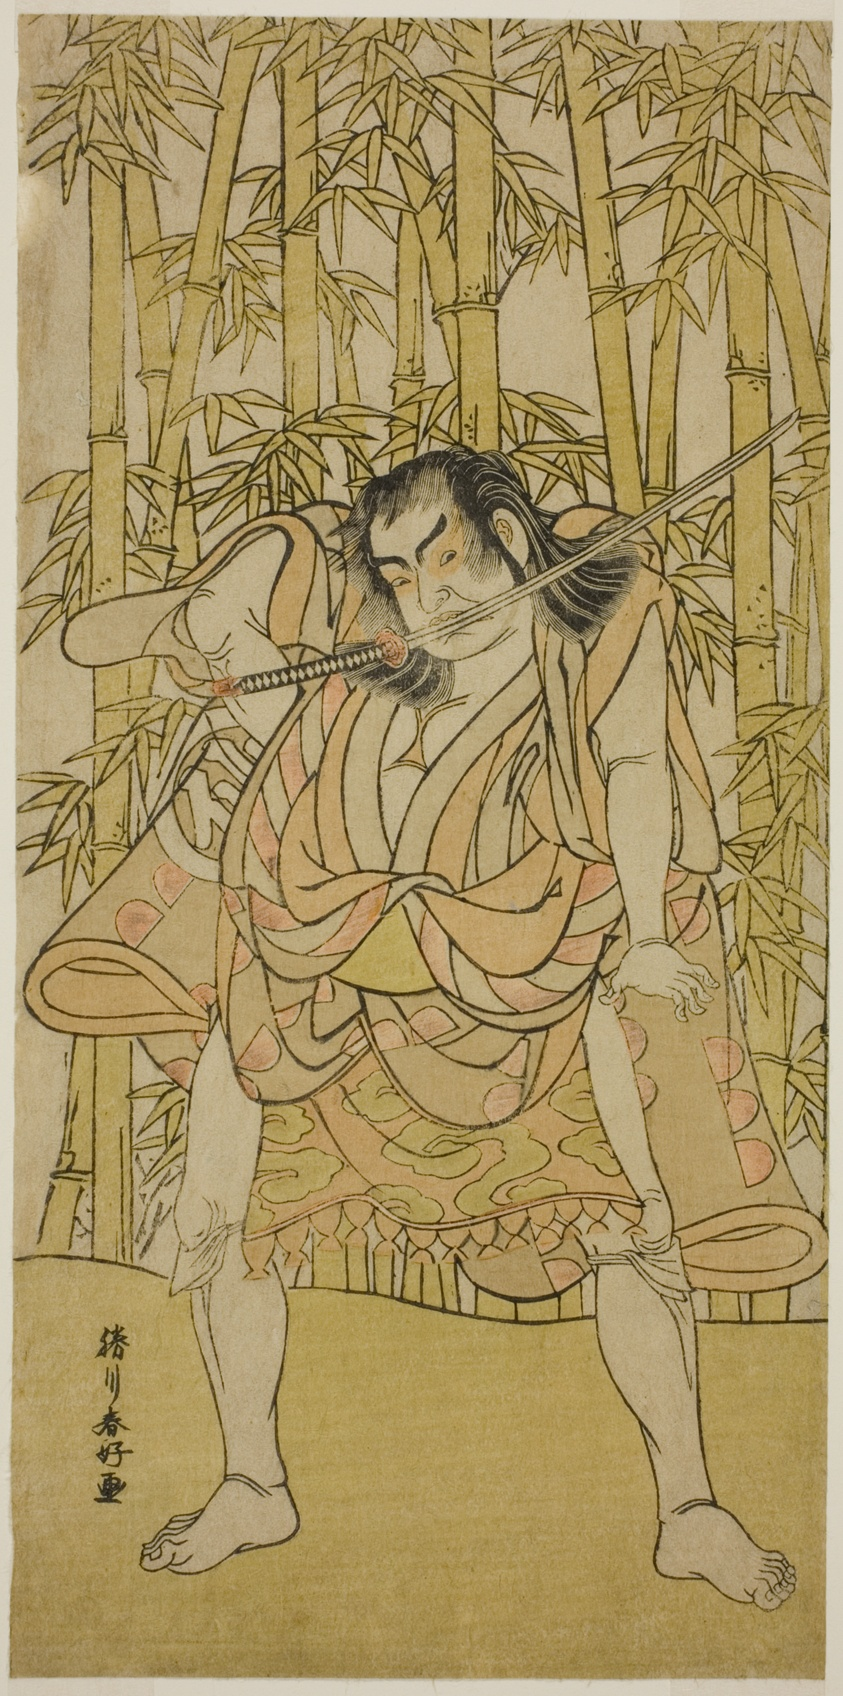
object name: Print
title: The Actor Nakamura Sukegoro II in an Unidentified Role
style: Japanese (culture or style)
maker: Katsukawa Shunko I; Japanese, 1743-1812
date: c. 1779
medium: Color woodblock print; hosoban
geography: Japan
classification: woodblock print; print; asian art